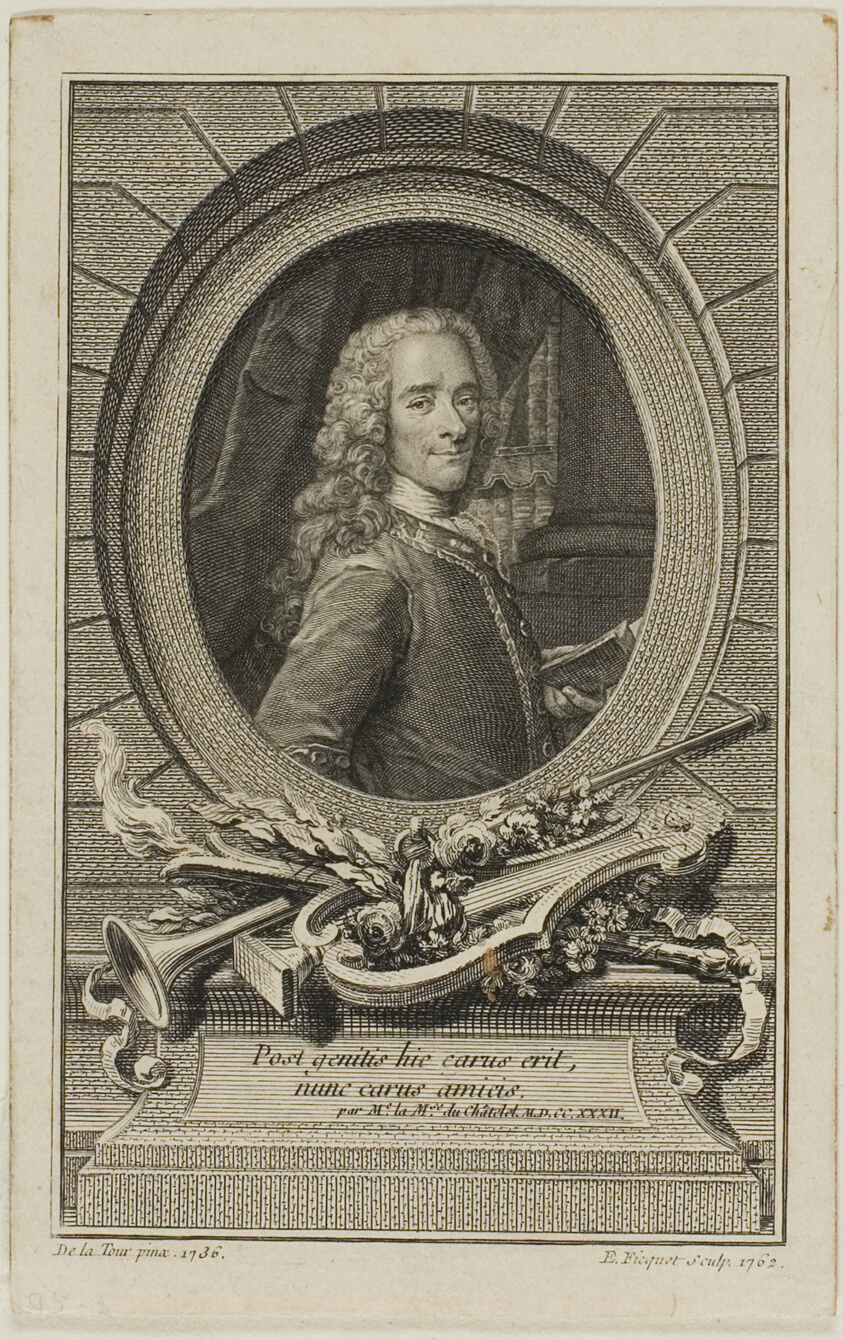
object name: Print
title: Voltaire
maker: Etienne Ficquet (French, 1719-1794); after Maurice-Quentin de la Tour (French, 1704-1788)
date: 1762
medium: Engraving on ivory laid paper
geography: France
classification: engraving; print; prints and drawing